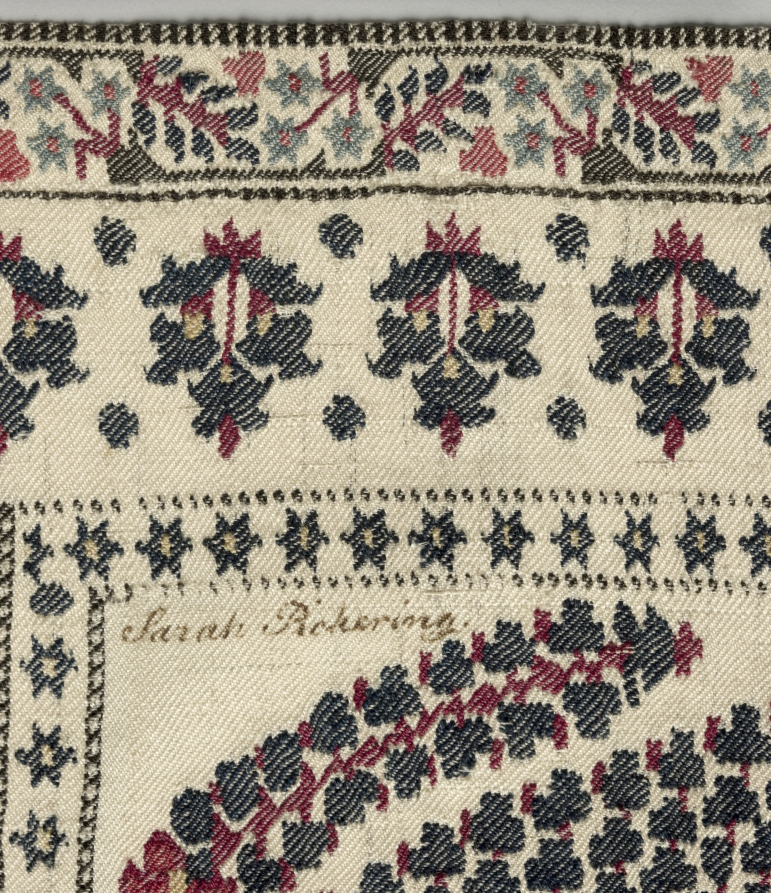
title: Long Shawl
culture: India, Kashmir, 19th century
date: c. 1812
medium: 2/2 twill tapestry weave, double interlocked; wool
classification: Textile